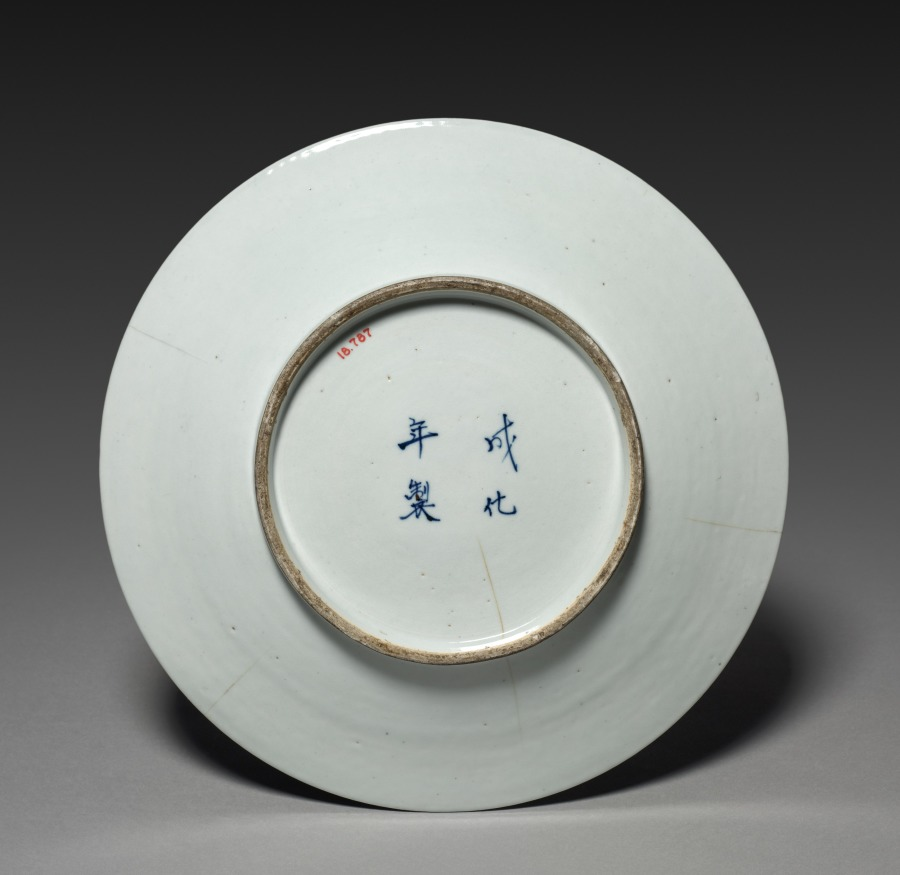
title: Plate: Arita Ware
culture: Japan, Edo period (1615–1868)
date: 1615–1868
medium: porcelain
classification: Ceramic